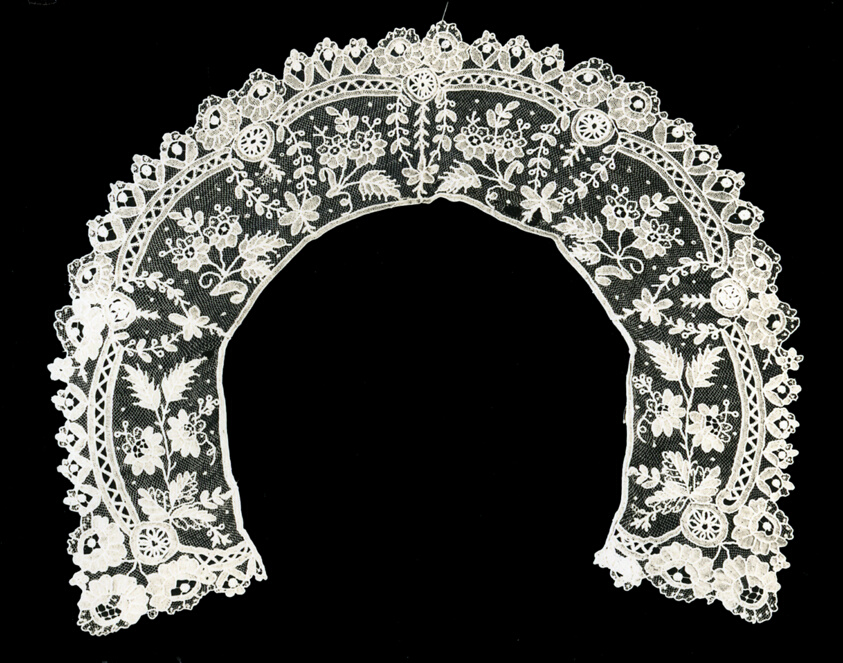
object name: Textile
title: Collar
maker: Belgium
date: c. 1880s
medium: Cotton, needle lace of a type known as "Point de Gaze"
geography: Belgium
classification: textile; lace - needle